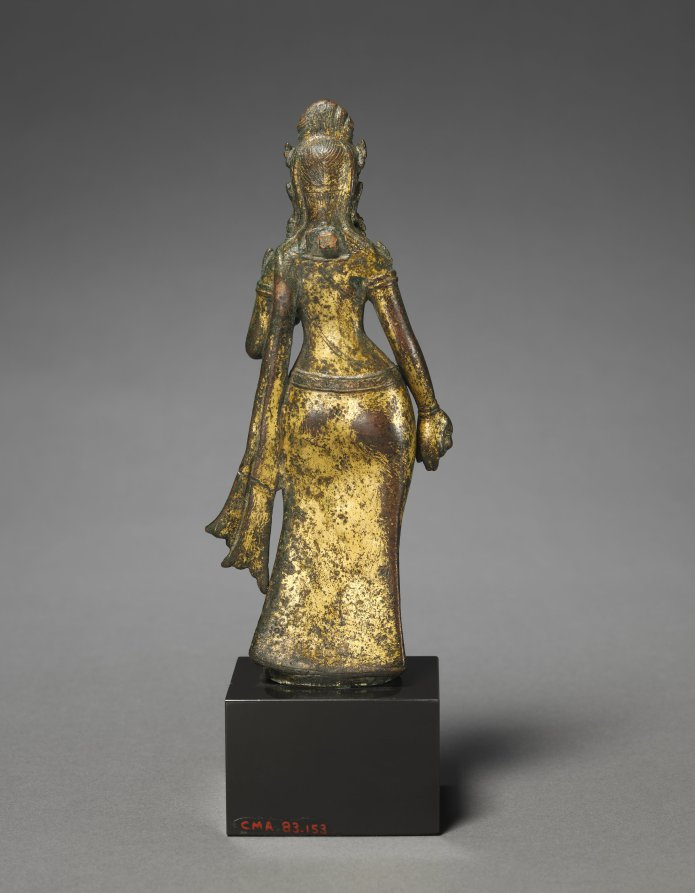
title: Devi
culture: Nepal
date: 600s–700s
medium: gilt bronze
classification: Sculpture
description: Exuding power and grace this diminutive image of a goddess is one of the earliest surviving bronze sculptures from Nepal. Her broad hips and simple, elegant garments and jewelry barely interrupt the contours of her form. Her lowered right hand, in the gift-giving gesture, holds a fruit, and her left hand once held the stem of a flower.